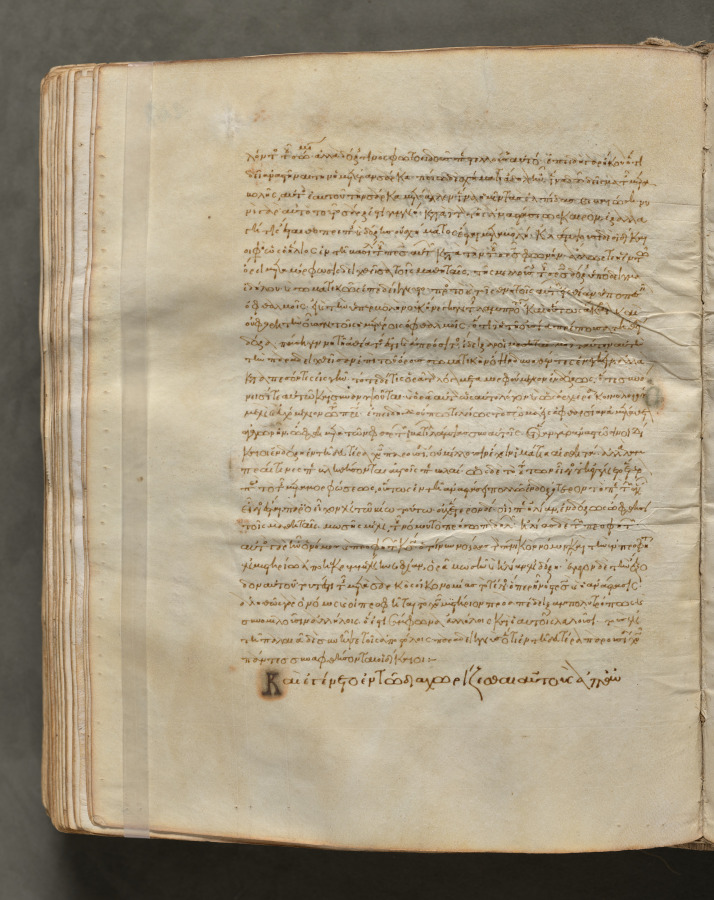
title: Text, folio 248 (verso), from a Gospel Book with Commentaries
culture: Byzantium, Constantinople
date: c. 1000–1100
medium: ink, tempera, and gold on vellum; leather binding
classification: Bound Volume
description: Each of the four gospels in this book opens on a page with brilliantly illuminated borders depicting the author of the text as well as birds—principally peacocks, symbols of the immortality of the soul—and fountains, representing the fountain of life and the salvation of the soul. This volume consists of 428 leaves with texts in Greek. Its level of sophistication suggests that it was probably written and decorated in a monastery in Constantinople.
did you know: Gospel books were carried in procession through Byzantine churches.